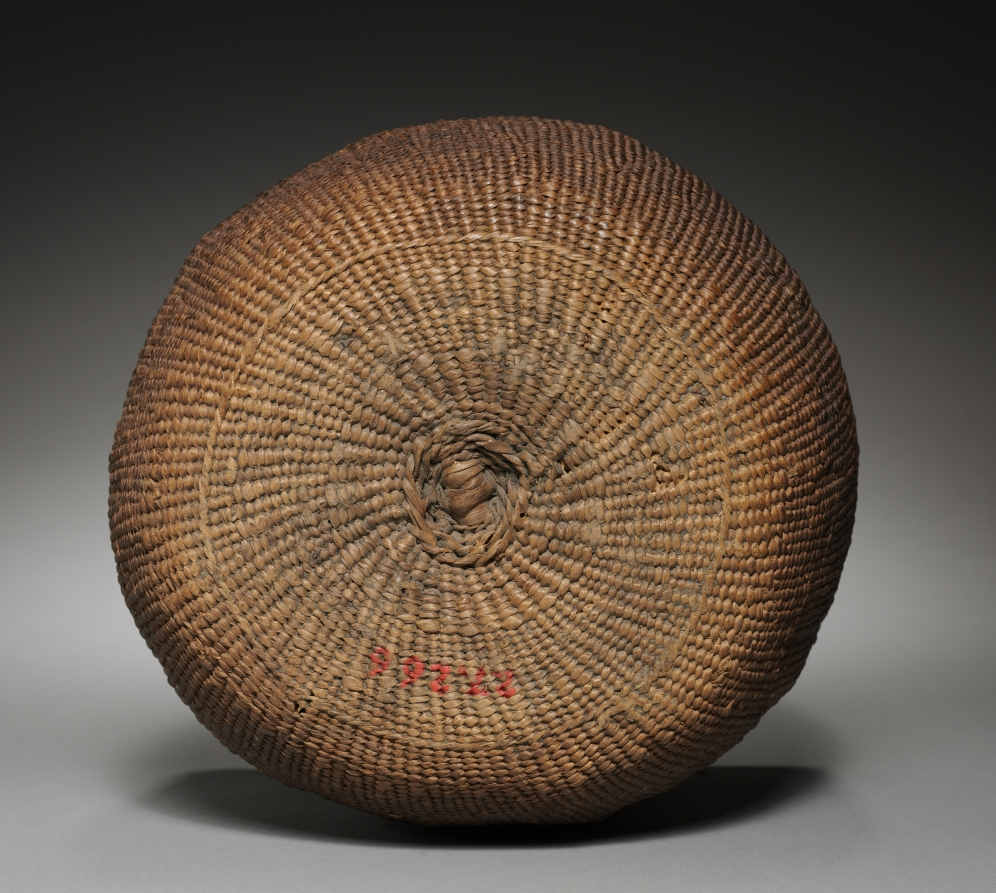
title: Cooking Bowl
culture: California (?), Native American, Unassigned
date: before 1927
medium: twined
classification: Basketry